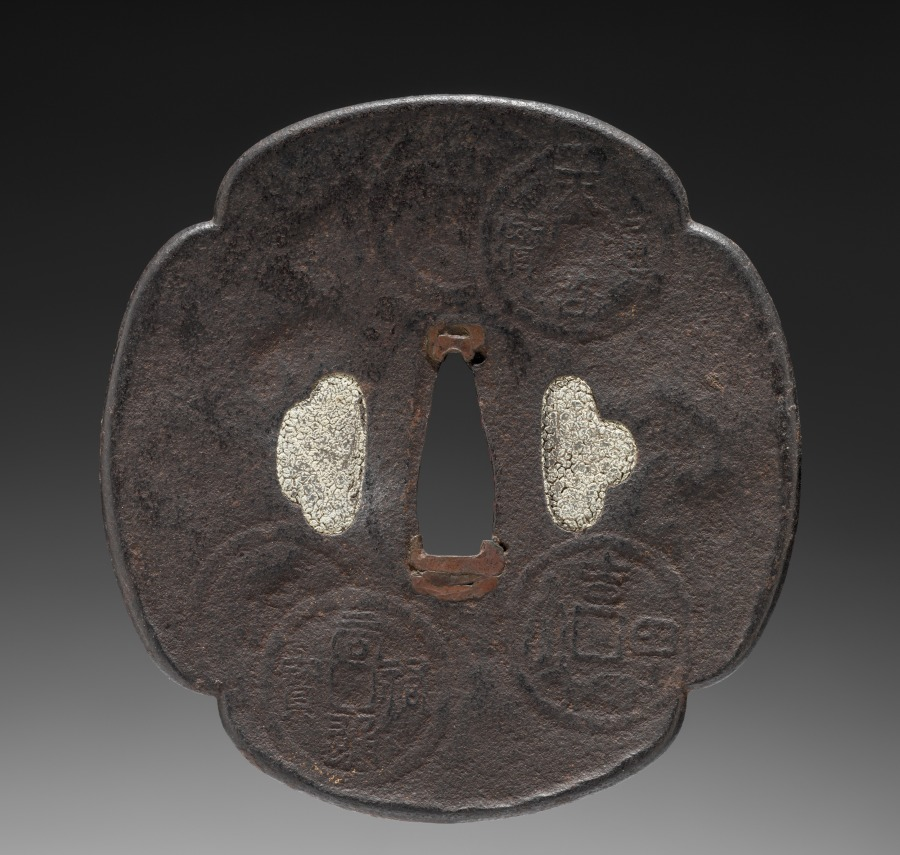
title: Sword Guard (Tsuba) with Coins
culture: Japan, possibly Edo period (1615-1868)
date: c. 1615–1868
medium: iron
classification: Arms and Armor